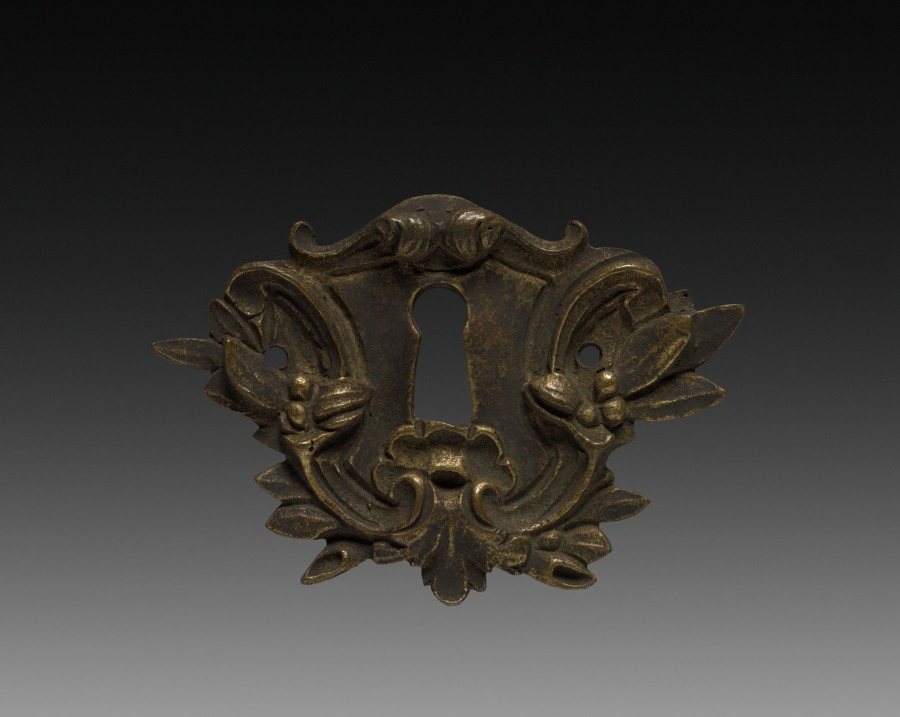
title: Ornamental Detail for a Keyhole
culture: France, 18th century, period of Louis XV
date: mid-1700s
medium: gilt bronze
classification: Metalwork